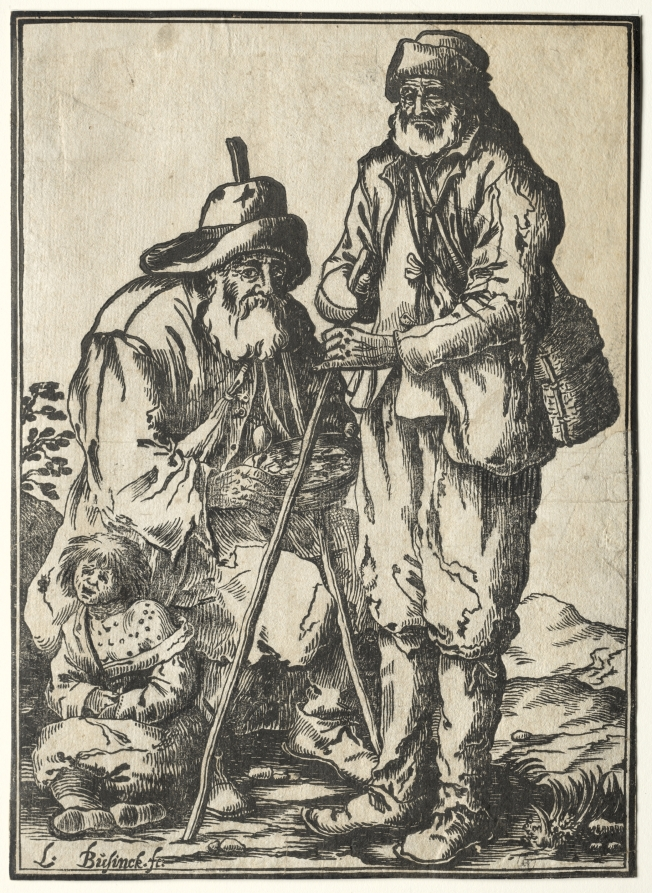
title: Two Beggars and Leprous Child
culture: Germany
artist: Ludolph Büsinck (German, 1590–1669)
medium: woodcut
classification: Print